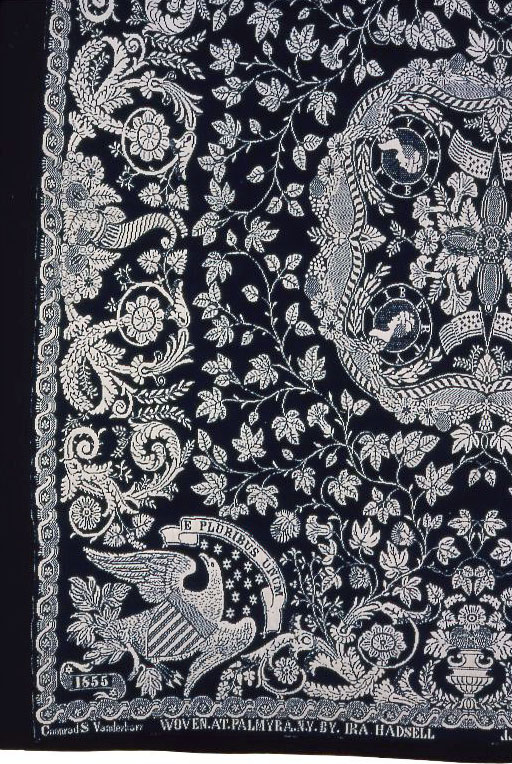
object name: Textile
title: Coverlet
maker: Ira Hadsell (American, 1813-1896); United States, New York, Wayne County, Palmyra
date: 1855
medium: Cotton and wool, plain weave double cloth; woven on loom with Jacquard attachment; full loom width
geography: New York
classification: textile; coverlet; weaving - coverlet; weaving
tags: coverlet